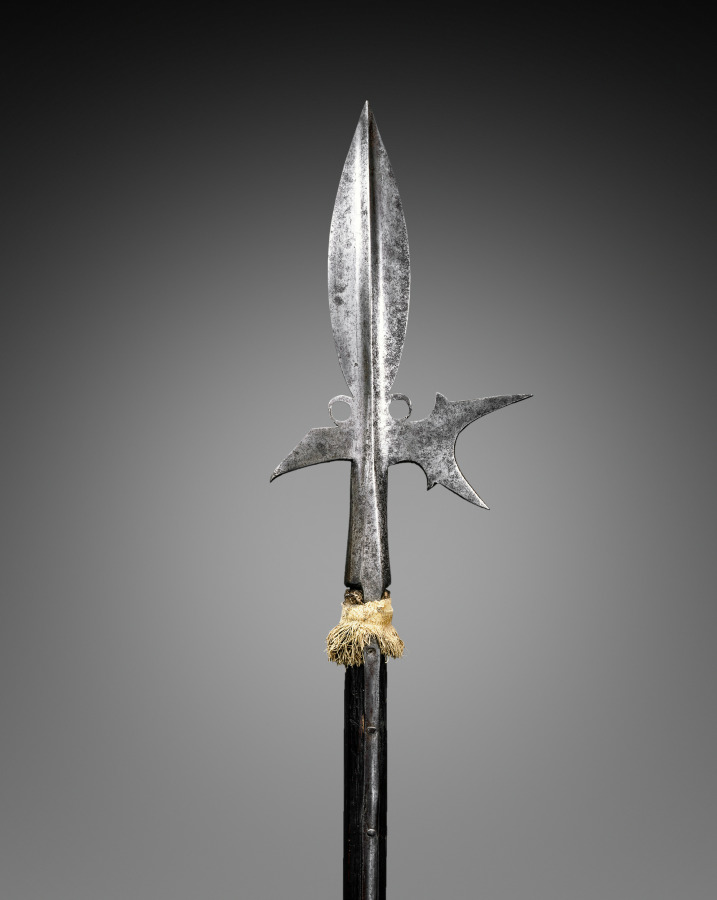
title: Halberd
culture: Germany, late 16th Century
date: c. 1580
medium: steel; leaf-shaped head; octagonal woof haft, woolen pompom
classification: Arms and Armor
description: The halberd was a staff weapon favored by European infantries (foot soldiers) of the 1400s and 1500s for its versatility and deadly effect. The word halberd comes from the German words Halm (staff) and Barte (axe). The halberd is, in fact, an axe that served multiple functions: the axe blade was used for hacking, the spike for thrusting, and the beak for piercing plate armor or for pulling a knight from his saddle. The halberd was used by shock troops (those who lead an attack) and by Swiss and German mercenaries. After about 1550, the halberd gradually became less functional. Its large blade provided space for coats of arms and insignia. By the late 1500s, the parade halberd had become a ceremonial weapon for palace guards.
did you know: The production of a halberd was surprisingly complicated. The blade must cut but the rest of the metal head had to flexibly absorb and distribute force without breaking.